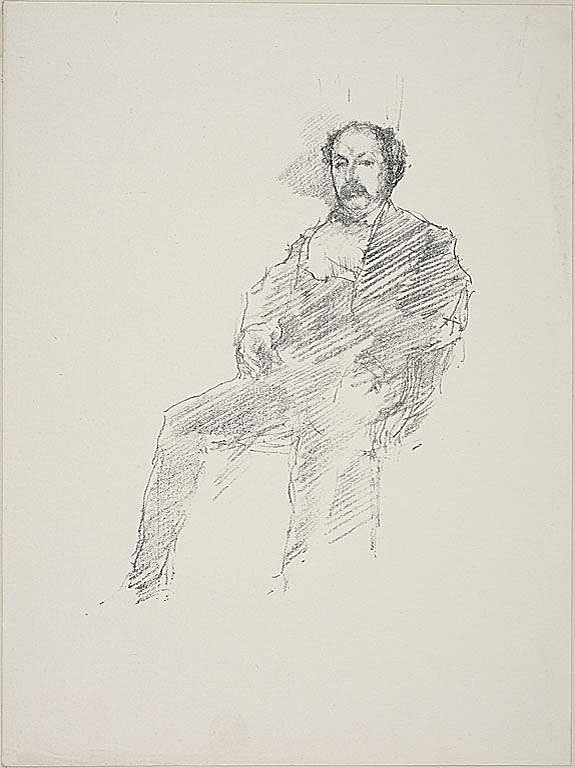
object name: Print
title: The Doctor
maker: James McNeill Whistler (American, 1834-1903)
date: 1894, published 1896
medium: Transfer lithograph in black on off-white wove paper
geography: United States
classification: transfer lithograph; lithograph; print; prints and drawing; paper